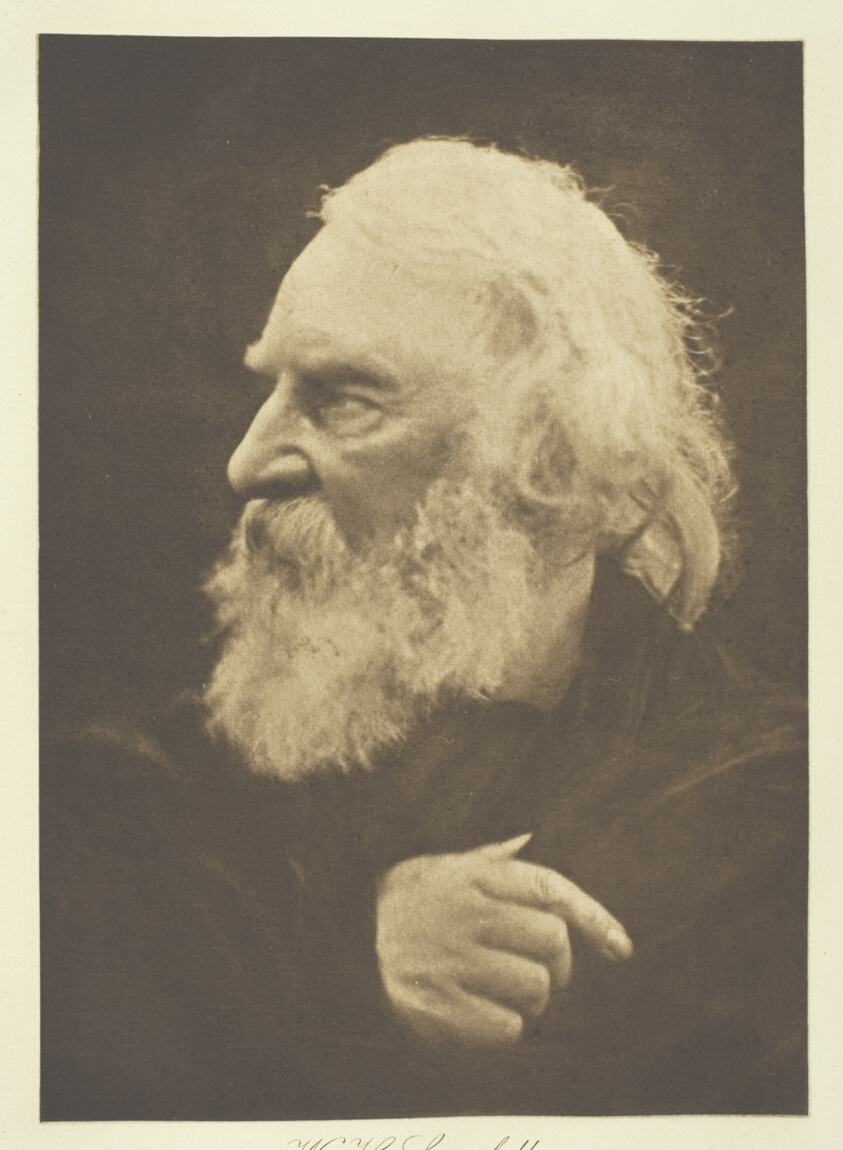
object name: Photograph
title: H. W. Longfellow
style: 19th century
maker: Julia Margaret Cameron (English, 1815–1879)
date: 1868, printed c. 1893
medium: Photogravure, plate 18 from the album "Lord Tennyson and his Friends" (1893)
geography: England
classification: photogravure; photomechanical process; photography; photograph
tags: Collected by Hugh Edwards, Lord Tennyson and His Friends